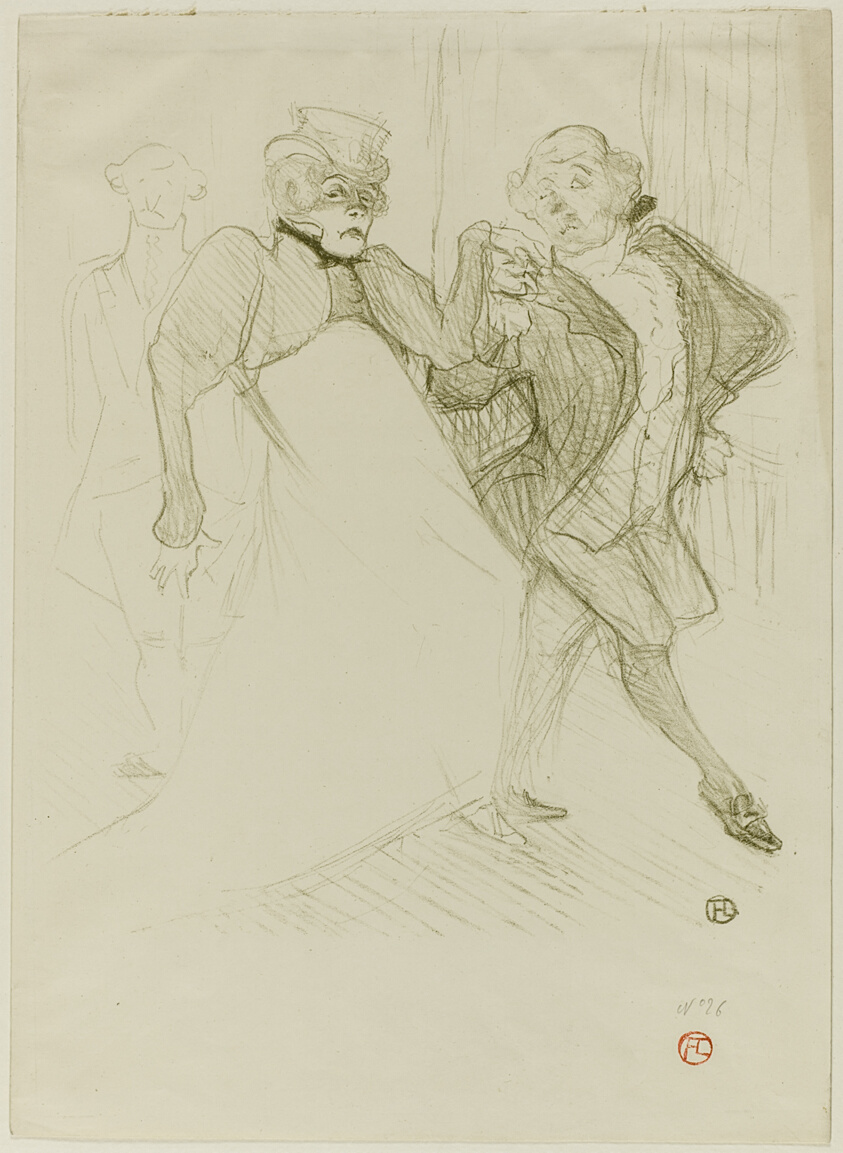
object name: Print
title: Réjane and Galipaux, in Madame Sans-Gêne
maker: Henri de Toulouse-Lautrec (French, 1864-1901)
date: 1893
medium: Color lithograph on cream wove paper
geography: France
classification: lithograph; print; prints and drawing